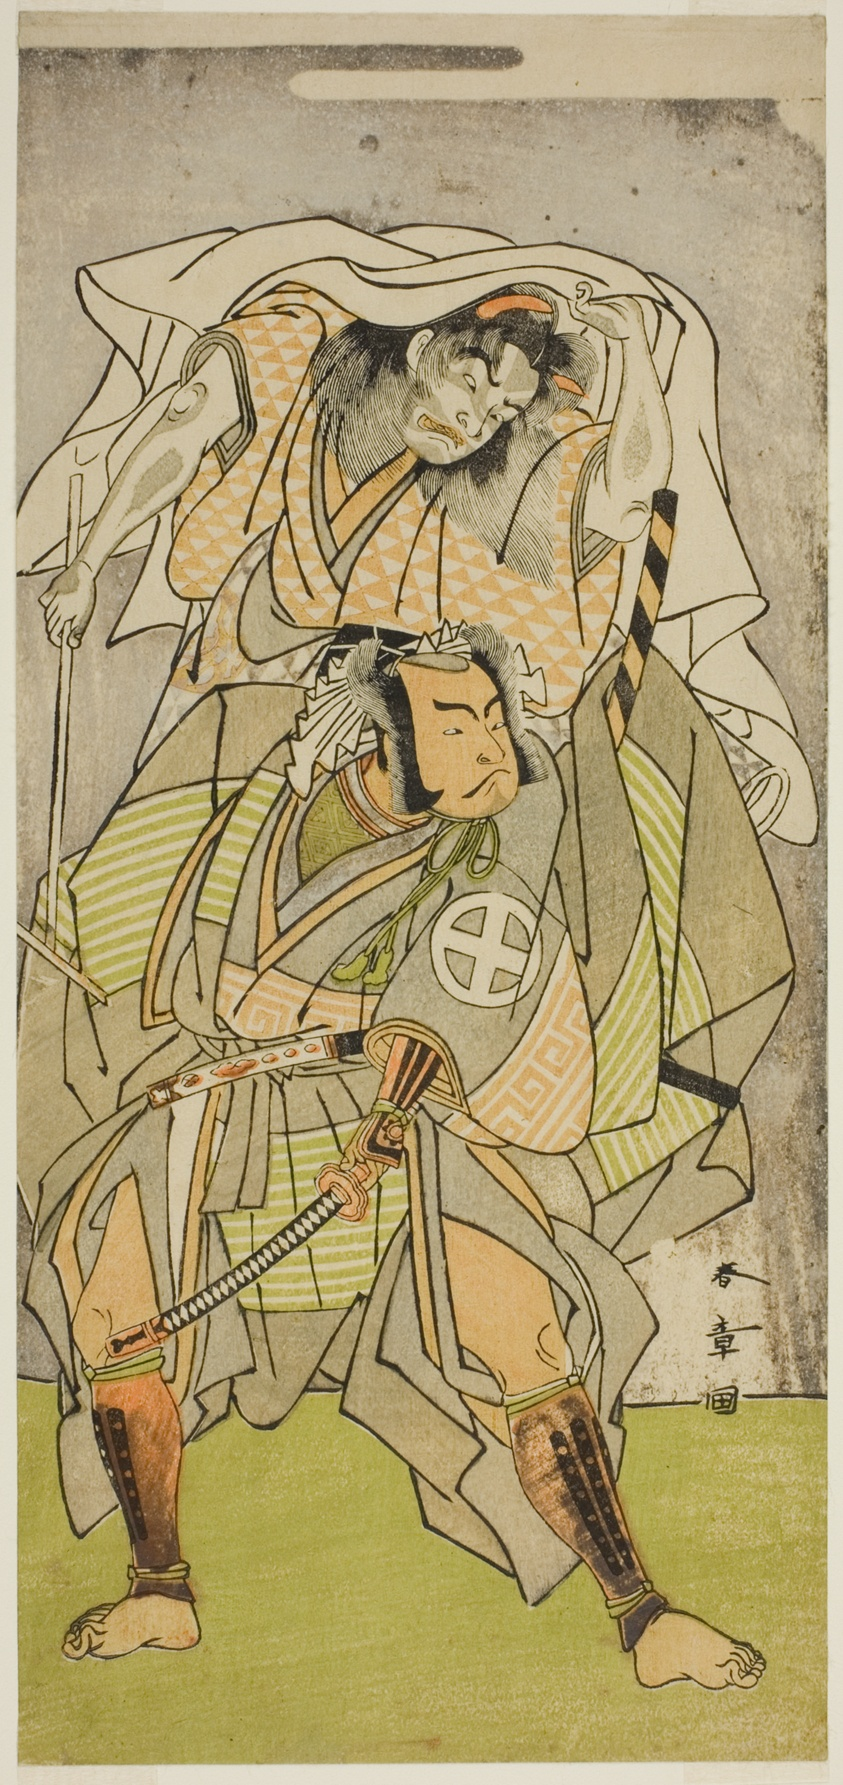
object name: Print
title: The Actors Otani Hiroji III as Koga Saburo, and Ichimura Uzaemon IX as the Devil of Kogakeyama, the Spirit of Wakasa no Zenji Yasumura, in the Play Kono Hana Yotsugi no Hachi no Ki, Performed at the Ichimura Theater in the Eleventh Month, 1771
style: Japanese (culture or style)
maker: Katsukawa Shunsho 勝川 春章; Japanese, 1726-1792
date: c. 1771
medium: Color woodblock print; hosoban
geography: Japan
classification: woodblock print; print; asian art